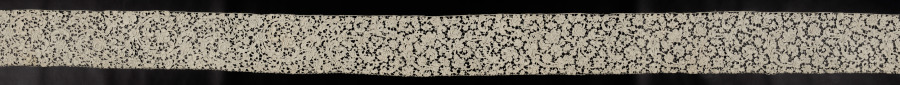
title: Lace Bed Valance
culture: Italy, Venice, 1660-1699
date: 1660–1699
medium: Needle lace (Venetian Raised Point)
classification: Lace